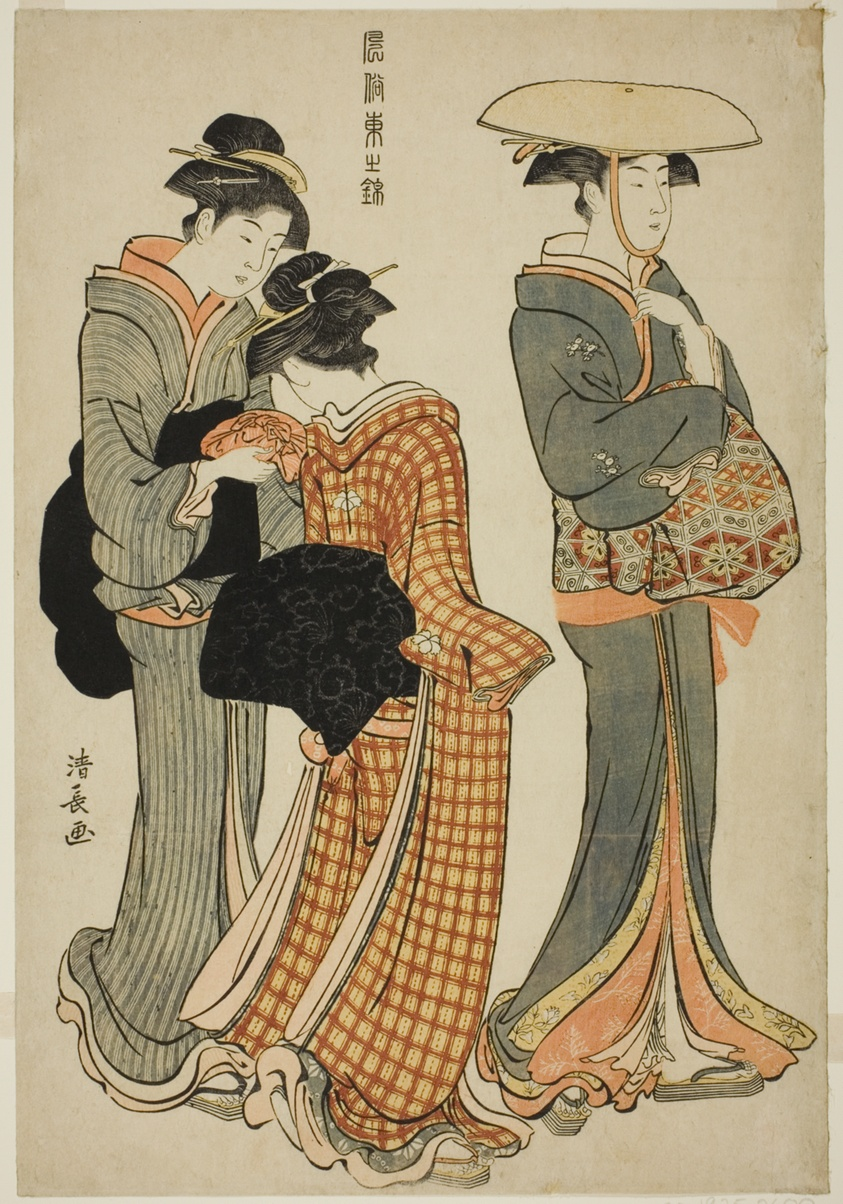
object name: Print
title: Two Women and a Maid, from the series "A Brocade of Eastern Manners (Fuzoku Azuma no nishiki)"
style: Japanese (culture or style)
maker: Torii Kiyonaga (Japanese, 1752-1815)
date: c. 1783/84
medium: Color woodblock print; oban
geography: Japan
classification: woodblock print; print; asian art